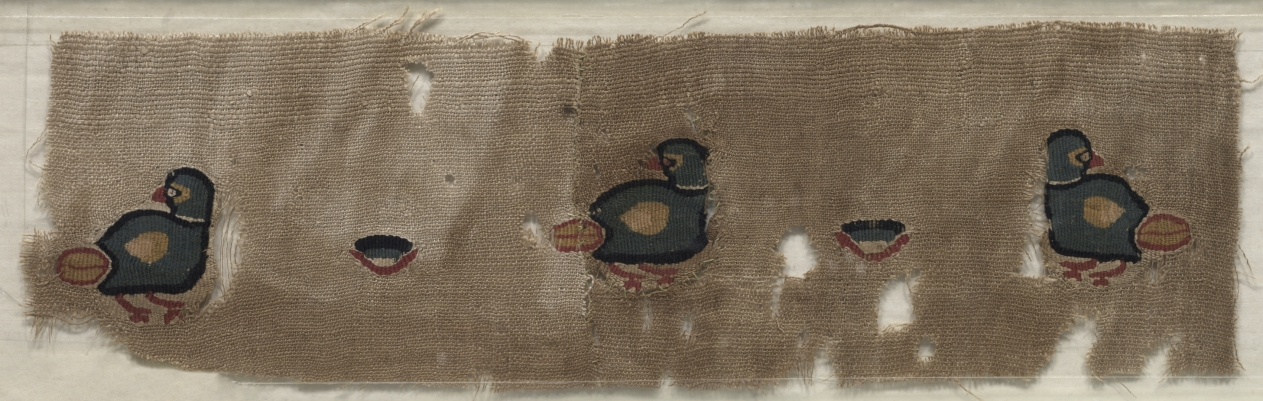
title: Fragment of a Curtain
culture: Egypt, Byzantine period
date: 500s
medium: tabby weave, inwoven tapestry ornament; wool and linen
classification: Textile